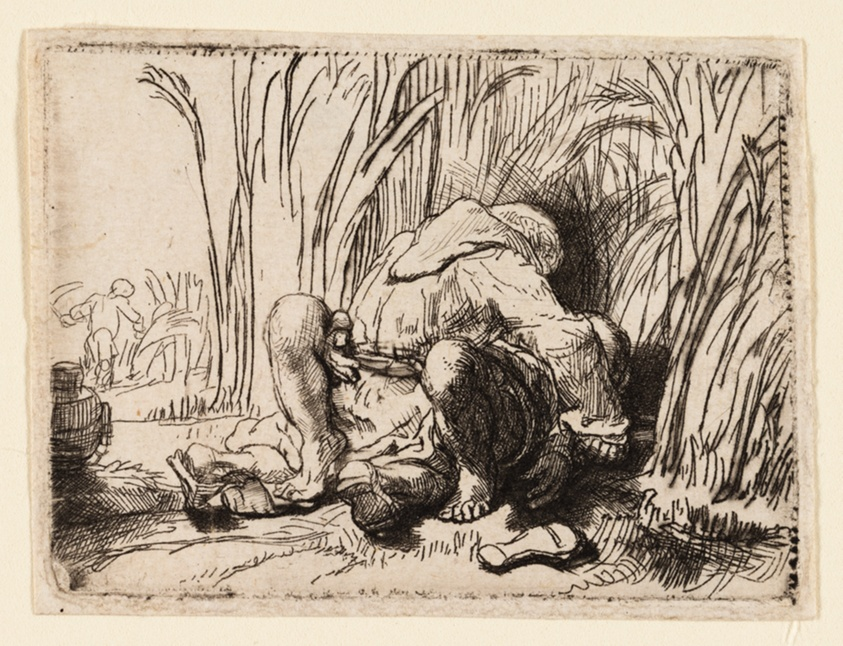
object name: Print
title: The Monk in the Cornfield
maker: Rembrandt van Rijn (Dutch, 1606-1669)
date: c. 1646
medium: Etching with drypoint on ivory laid paper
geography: Netherlands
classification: etching; print; prints and drawing; paper